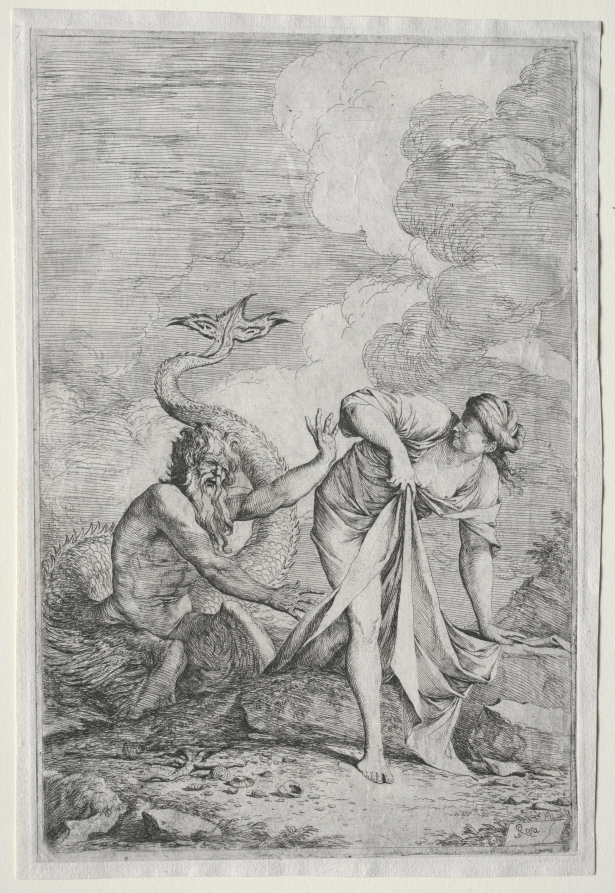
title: Glaucus and Scylla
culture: Italy, 17th century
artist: Salvator Rosa (Italian, 1615–1673)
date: c. 1661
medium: etching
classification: Print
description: Salvatore Rosa was a prolific and skilled printmaker, producing more than 100 etchings throughout his career. Derived from Ovid's Metamorphoses, Glaucus and Scylla tells a story associated with magic and witchcraft. After drinking a magical herb, the fisherman Glaucus was immortalized and transformed into a sea god with fins and a fish tail. Rosa depicts the moment in which the amorous Glaucus declares his love to the beautiful water nymph, Scylla, who flees. Later, Glacus implored the witch Circe to help him win the heart of Scylla, but attracted to the sea god herself, the jealous witch poisoned the waters where Scylla lived, turning the nymph into the infamous rock that troubled Ulysses and countless sea travelers. The ominous, rolling clouds and Glaucus's thrashing form project the drama of Scylla's escape and foreshadow her own metamorphosis to come.